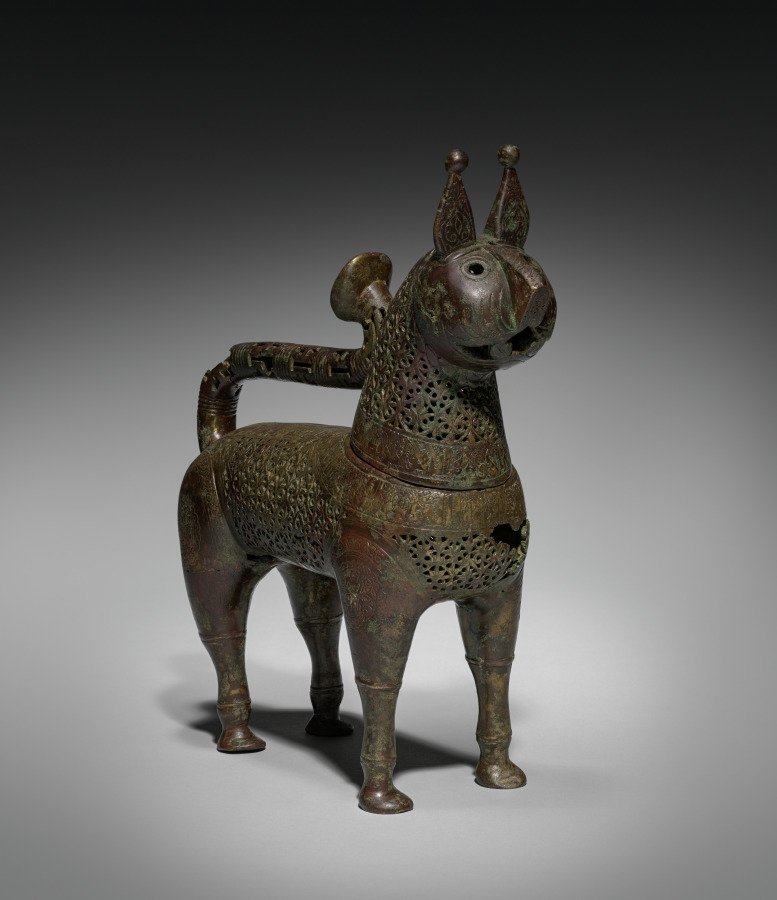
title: Feline Incense Burner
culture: Iran, Khurasan, Seljuq period of Iran (1037–1194)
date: 1150–1200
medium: Copper alloy, cast, engraved, chased, and pierced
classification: Metalwork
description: In Iran during the 1000s and 1100s, vessels in the shape of animals gained popularity, especially as incense burners. Felines were favored in Persian art and this piece may represent a caracal, a type of lynx. The head of the creature was cast separately and is removable to fill its body with hot coals and incense. Qur’anic verses on the neck and spine remind worshippers to set work aside, attend prayer, and then disperse to seek God’s bounty. The diffusion of perfumed smoke through the burner’s pierced palmette design may have served as a sensorial reminder of this teaching.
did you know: Arabic inscriptions in Kufic script against a background of scrolling arabesques run along the back and neck of the feline form.